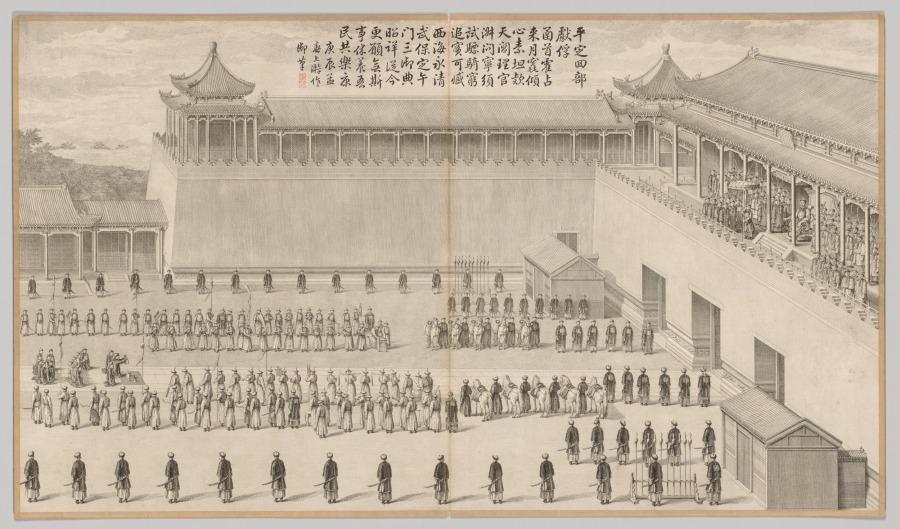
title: The Presentation of Uigur Captives: from Battle Scenes of the Quelling of Rebellions in the Western Regions, with Imperial Poems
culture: China, Qing dynasty (1644–1911), Qianlong reign (1736–95)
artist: Jean Denis Attiret (French, 1702–1768)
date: c. 1765–74; poem dated 1760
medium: etching, mounted in album form, 16 leaves plus two additional leaves of inscriptions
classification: Print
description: This set of etchings was commissioned by Emperor Qianlong to record in pictorial terms the courage of his generals and soldiers in quelling the rebellions in the Western Regions. Qianlong added his own poem to each of the etchings, indicating his appreciation and pride in this demonstration of military might. "Western Regions" refers to the present-day Xingjiang province, often described in Western writing as "Central Asia."